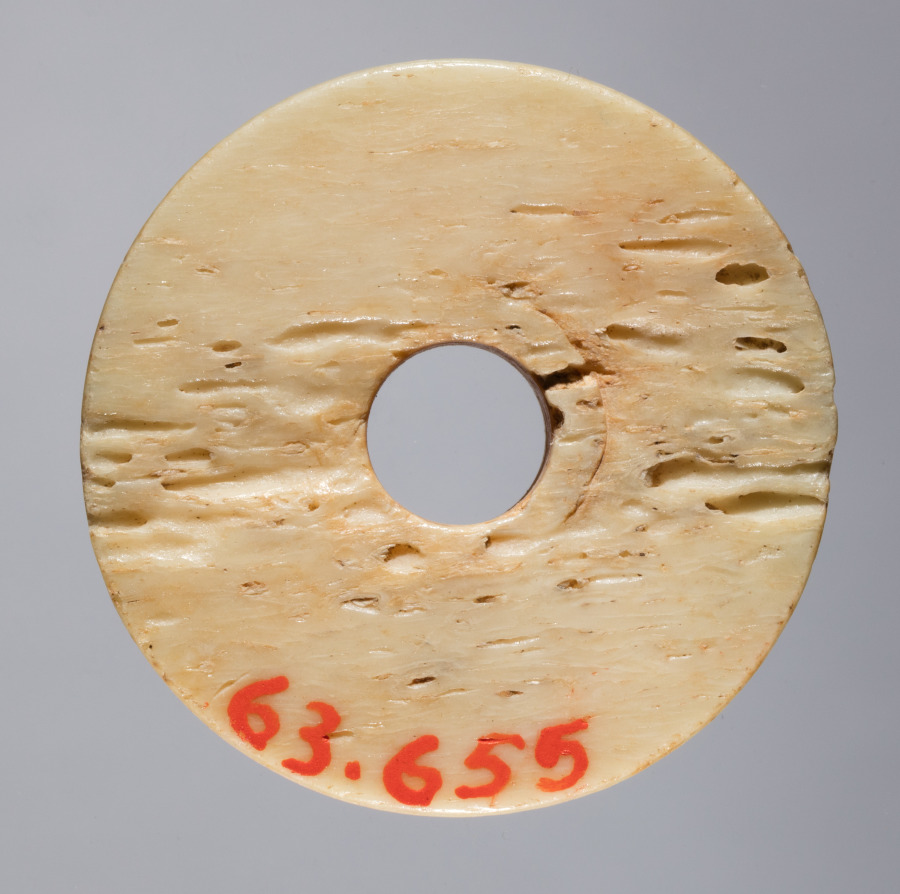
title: Spindle Whorl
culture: Iran, early Islamic period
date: 700s - 900s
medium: bone, incised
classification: Spindle Whorl